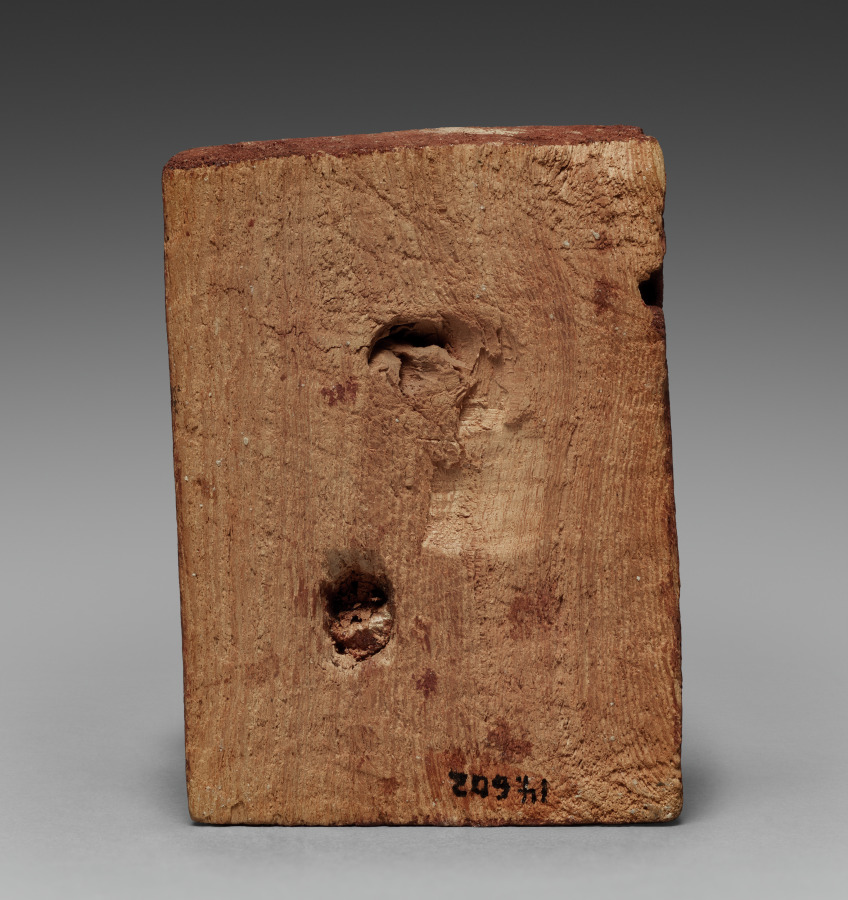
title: Female Offering Bearer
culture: Egypt, Middle Kingdom (2040–1648 BCE), Dynasties 11–12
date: 2000–1801 BCE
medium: painted wood, figure of tamarisk(?), base of sycamore fig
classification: Wood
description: The offering bearer wears a basic wraparound kalasiris dress and a strap that connects to the dress over her left shoulder. It is not known whether straps on ancient Egyptian dresses were designed as a part of the garment or were separate attachments for fashionable or utilitarian purposes. Ancient Egyptian illustrations typically identify women who wore this garment with a strap as servants, whereas artisans depicted men of all socioeconomic levels wearing the version for men.